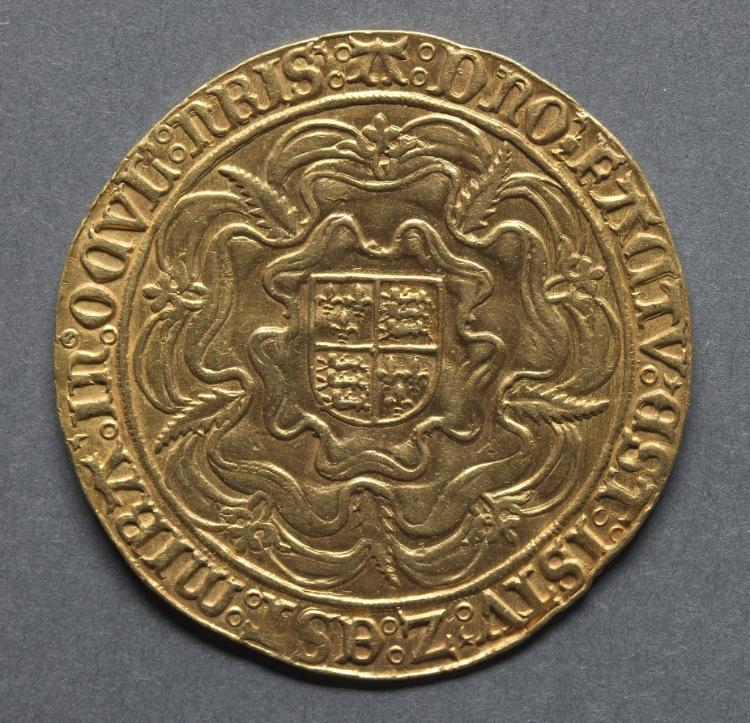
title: Sovereign: Shield of Royal Arms on a Tudor Rose (reverse)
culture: England, Mary, 1553-1554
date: 1553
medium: gold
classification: Coins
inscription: A DNO FACTV EST ISTV Z EST MIRA IN OCVL NRIS